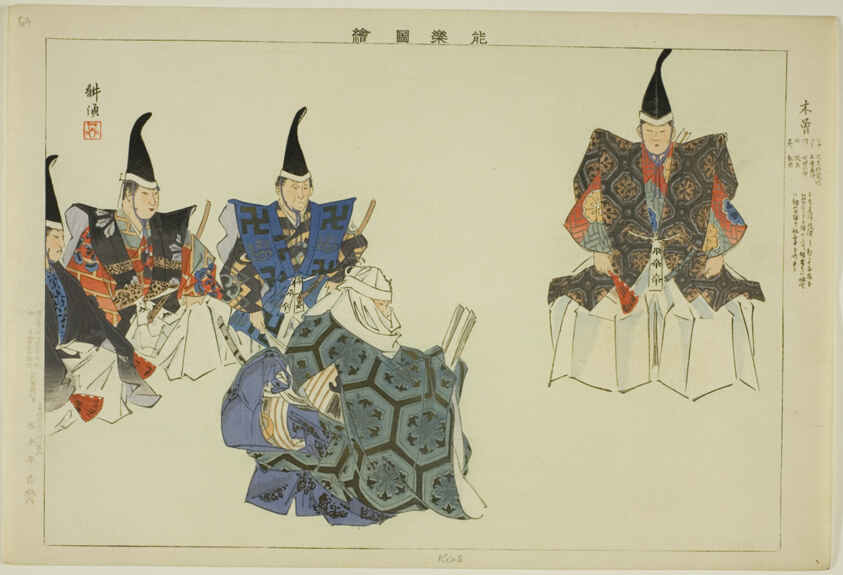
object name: Print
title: Kiso, from the series "Pictures of No Performances (Nogaku Zue)"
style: Japanese (culture or style)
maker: Tsukioka Kogyo; Japanese, 1869-1927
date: 1898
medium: Color woodblock print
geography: Japan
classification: woodblock print; print; asian art